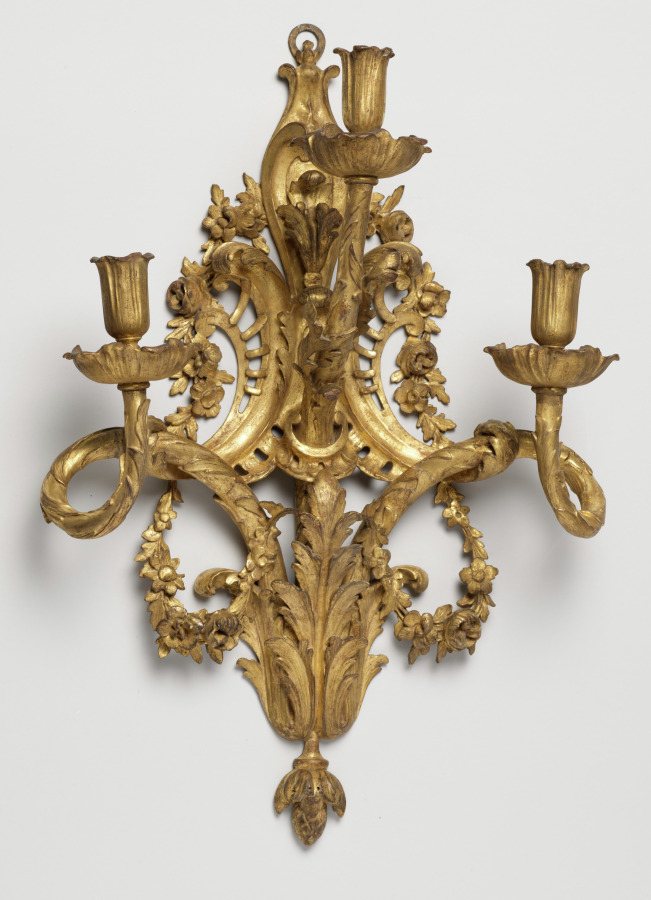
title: Candle Bracket (1 of 2)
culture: France, Transitional Style, Louis XV to Louis XVI, 18th century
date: c. 1765–1775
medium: gilded wood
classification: Furniture and woodwork